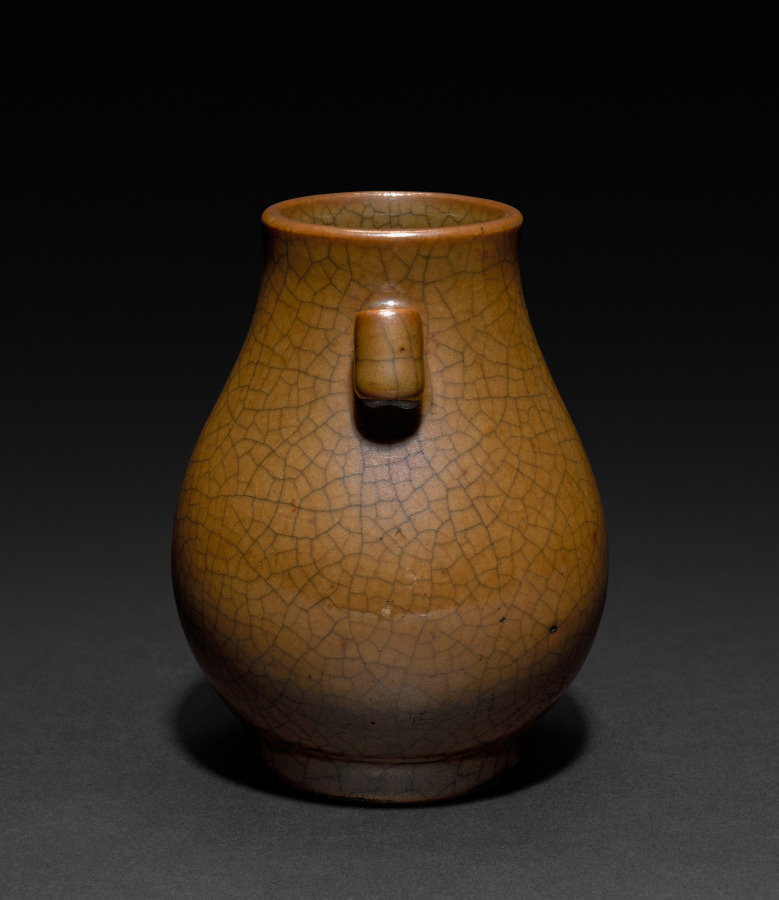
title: Pear-shaped Jar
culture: China, Qing dynasty (1644-1911), Kangxi reign (1661-1722)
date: 1661–1722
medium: porcelain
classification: Ceramic